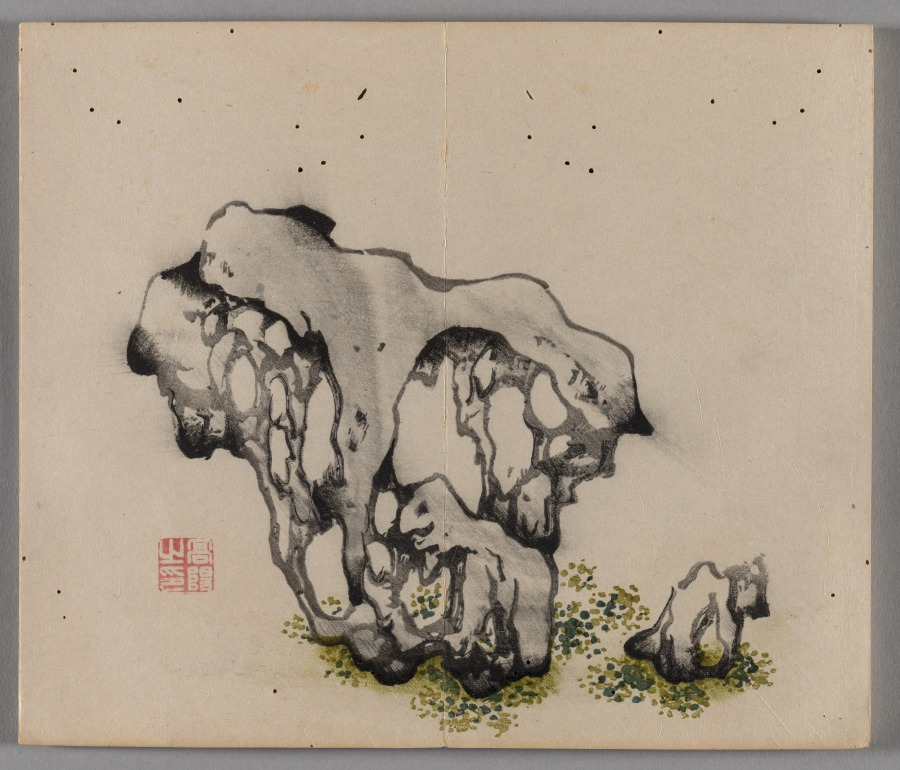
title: Ten Bamboo Studio Painting and Calligraphy Handbook (Shizhuzhai shuhua pu): Rocks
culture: China, Qing dynasty (1644-1911)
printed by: Hu Zhengyan (Chinese, c. 1584–1674)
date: 1633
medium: Woodblock-printed book; ink and colors on paper; first edition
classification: Print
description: Color printing reached a level of perfection in the early 1600s, as seen in this Ten Bamboo Studio Collection of Calligraphy and Painting and the Mustard Seed Garden Manual of Painting (printed 1679 and 1701). The painterly quality, precision in registering (aligning) the woodblocks, and harmonious colors made them the most successful color print editions in Chinese history. Both editions were printed and compiled in Nanjing, spread nationwide, and had a great impact on the arts in Japan and Korea.